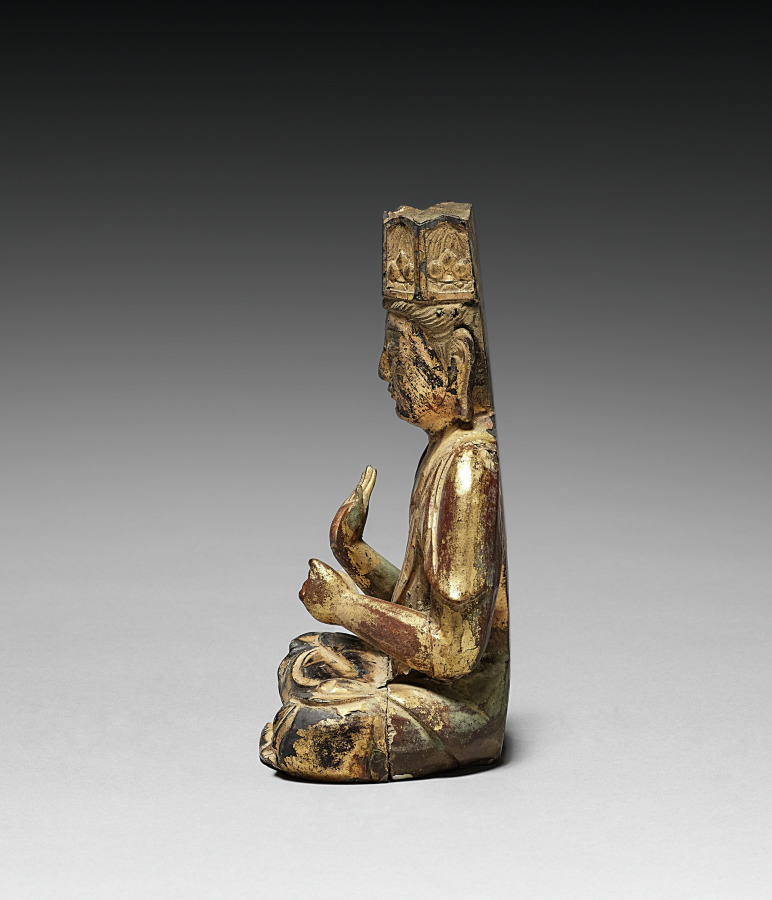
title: Bodhisattva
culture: Japan, Heian period (794–1185)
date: 900s-1100s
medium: gilded wood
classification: Sculpture